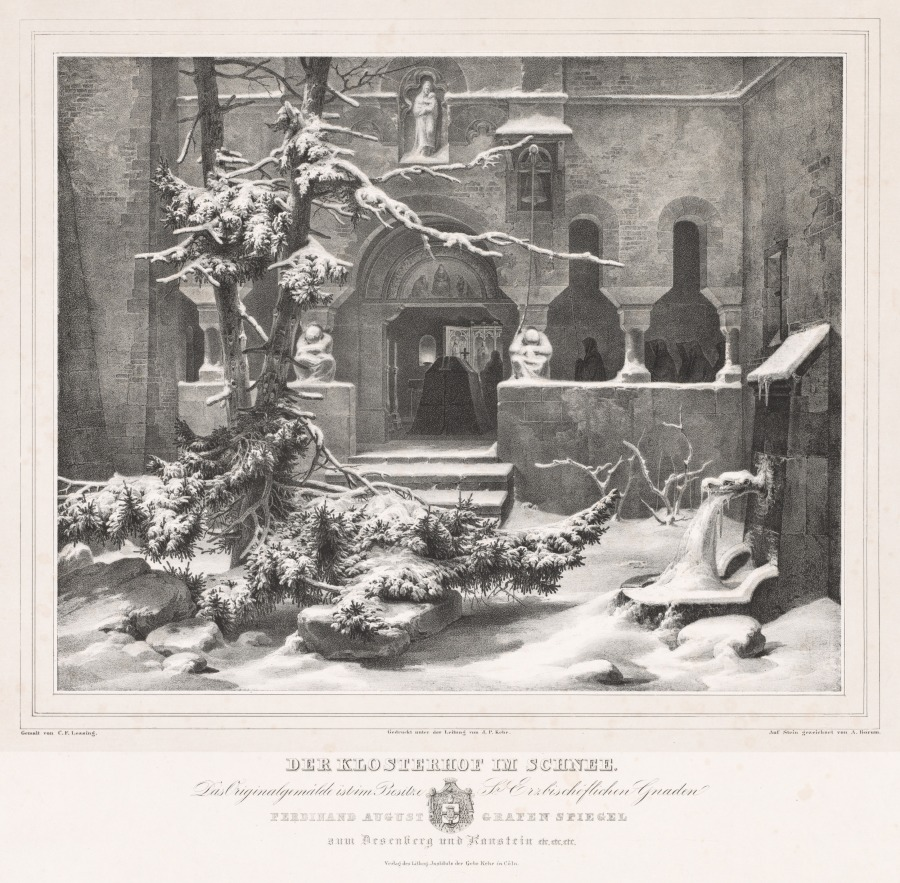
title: Churchyard with Snow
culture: Germany, 19th century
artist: Andreas Borum (German, 1799–1853)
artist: after Carl Friedrich Lessing (German, 1808–1880)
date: c. 1835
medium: lithograph in black and gray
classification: Print